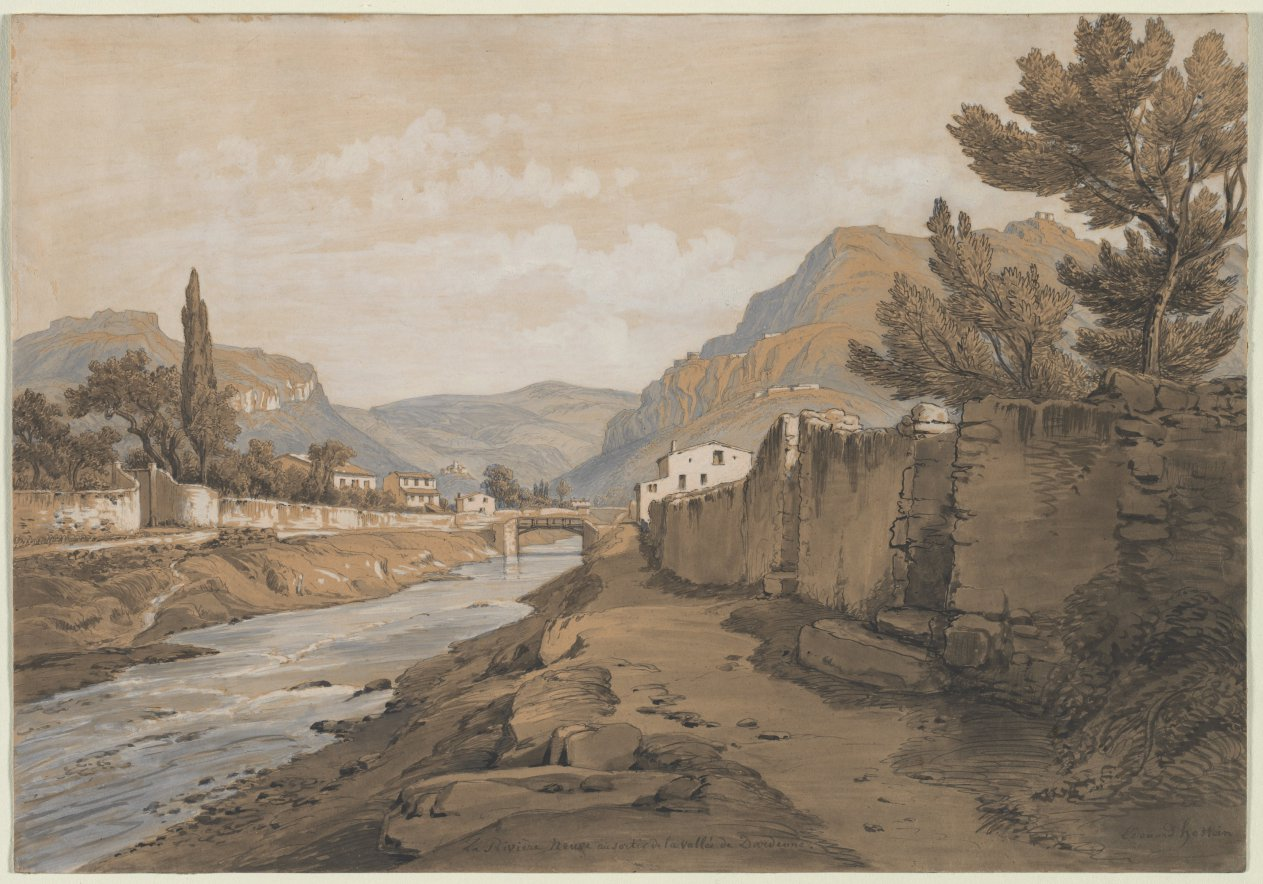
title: The Neuve River at the End of the Dardenne Valley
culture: France, 19th century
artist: Edouard Jean Marie Hostein (French, 1804–1889)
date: 1800s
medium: pen and brush and black ink, brush and brown and gray wash, and white and gray-blue gouache, over graphite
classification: Drawing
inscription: signed, lower right, in gray ink: Edouard hostein ; by artist, lower center, in gray ink: La Rivière Neuve au sortir de la Vallée de Dardenne